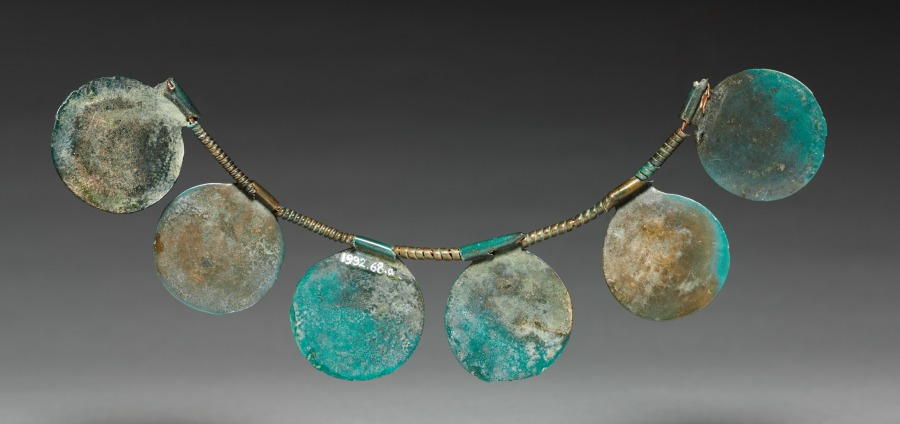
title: Necklace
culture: possibly Hungary, Bronze Age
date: c. 1400–1300 BCE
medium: bronze, cast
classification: Jewelry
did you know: The cast bronze necklace pendants are partially oxidized, revealing a green patina.